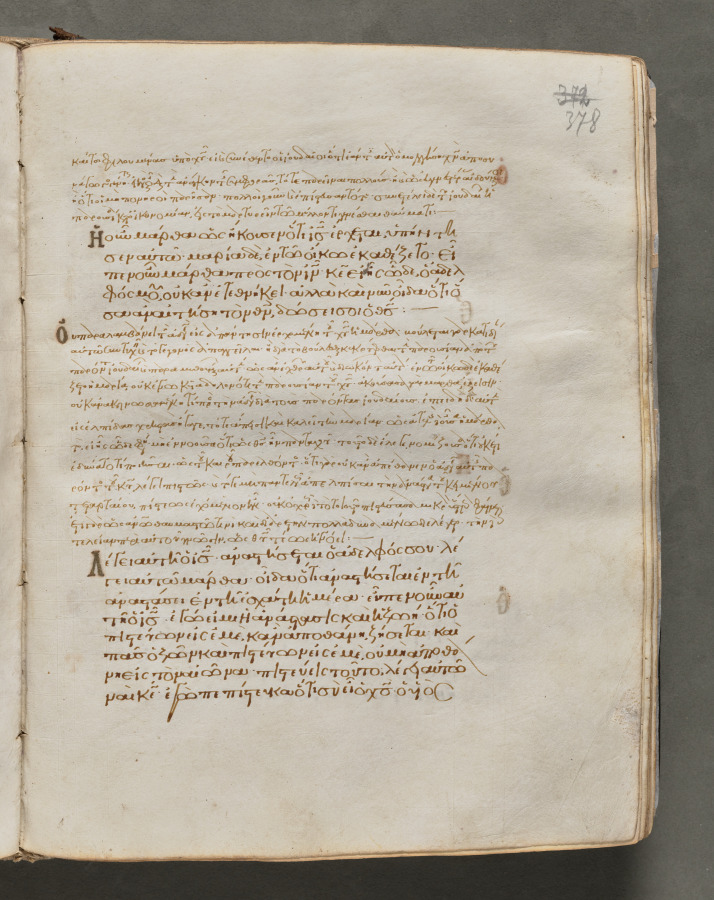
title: Text, folio 378 (recto), from a Gospel Book with Commentaries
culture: Byzantium, Constantinople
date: c. 1000–1100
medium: ink, tempera, and gold on vellum; leather binding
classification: Bound Volume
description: Each of the four gospels in this book opens on a page with brilliantly illuminated borders depicting the author of the text as well as birds—principally peacocks, symbols of the immortality of the soul—and fountains, representing the fountain of life and the salvation of the soul. This volume consists of 428 leaves with texts in Greek. Its level of sophistication suggests that it was probably written and decorated in a monastery in Constantinople.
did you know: Gospel books were carried in procession through Byzantine churches.